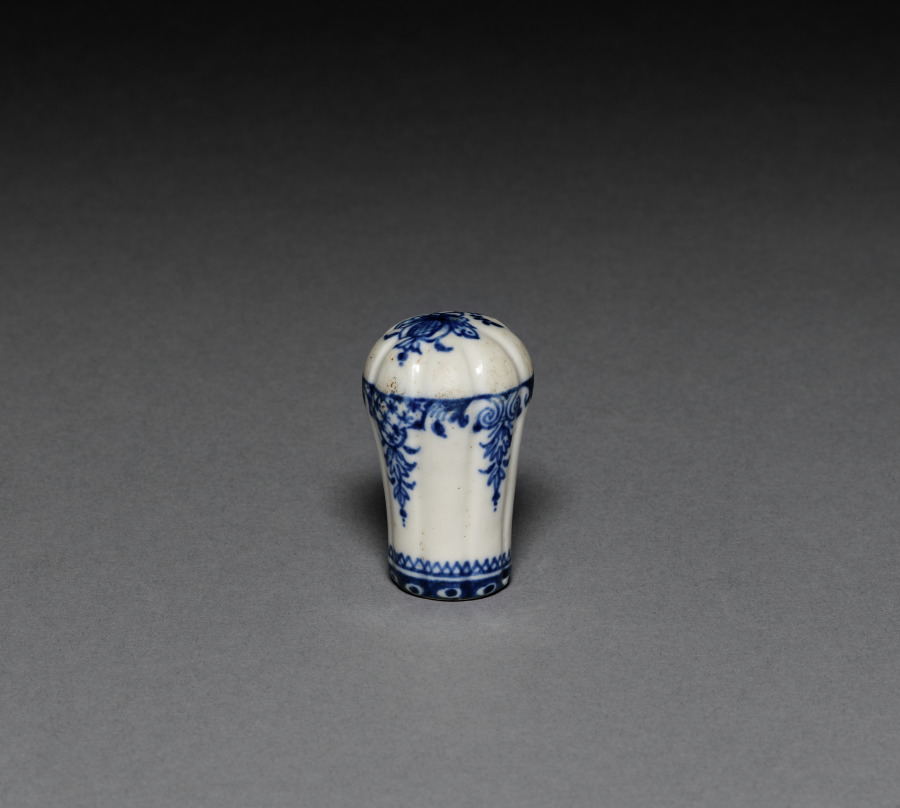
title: Cane Handle (Poignée de canne)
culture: France, Saint Cloud, early 18th Century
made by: Saint Cloud Porcelain Factory (French)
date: c.1700–1720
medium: soft-paste porcelain with underglaze blue decoration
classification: Ceramic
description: With its ribbing and underglaze blue decoration in the form of draping blue garlands, this porcelain handle was likely among the first to have been produced at the Saint-Cloud Porcelain Factory. Though Saint-Cloud may have been the first to produce porcelain cane handles as fashionable accessories, their popularity meant that they were soon produced at a variety of other French factories during the first half of the 1700s.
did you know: Canes, or sticks, were popular fashion accessories for aristocratic men, women, and children in 18th-century France.